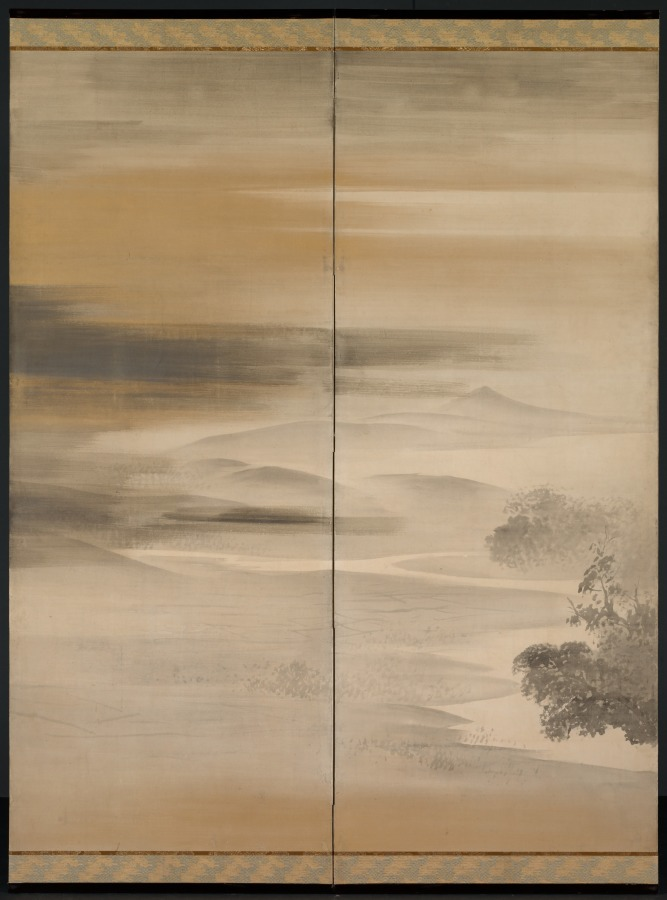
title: Summer Night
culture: Japan, Edo period (1615–1868)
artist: Maruyama Ōkyo (Japanese, 1733–1795)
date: 1784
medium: Six-panel folding screen, ink, gold, and silver on paper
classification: Painting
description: Ōkyo painted these panoramas in the summer of 1784. Regarded as Kyoto's most important painting teacher and accomplished artist, he had studied Western painting techniques, "realistic" sketching from nature, and traditional Japanese style painting (yamato-e). The naturalistic quality of these scenes results from a blend of detailed observation of nature and a remote, even detached regard for man's place in the world.